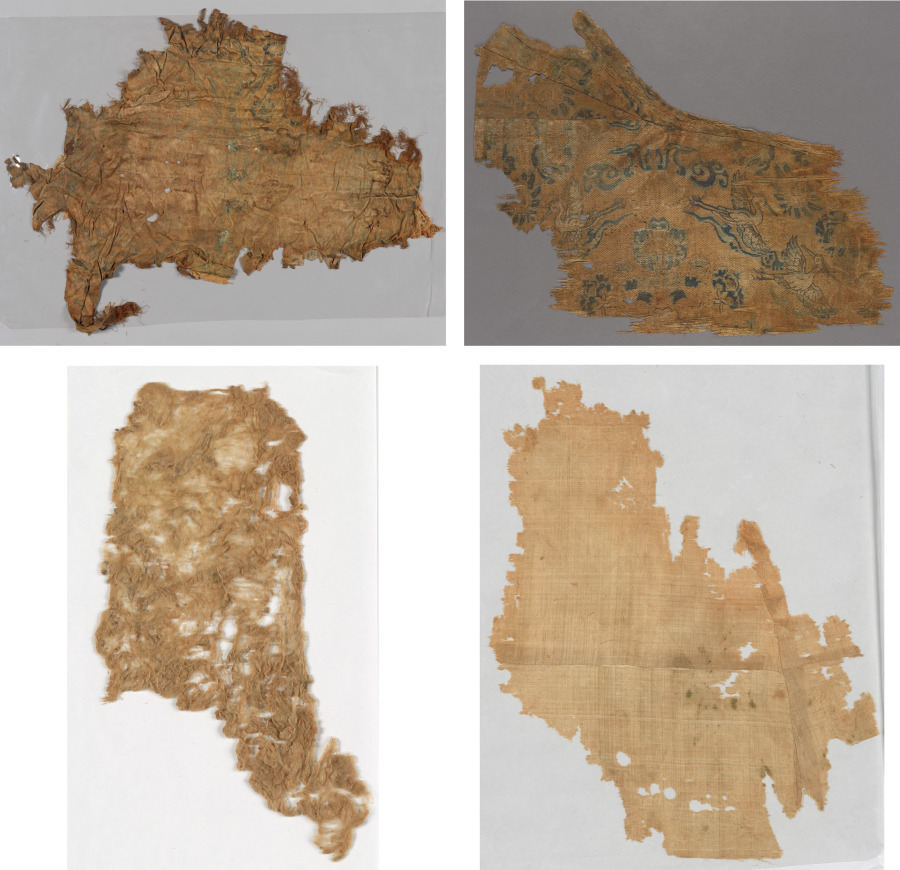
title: Fragments from a Garment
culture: China, Liao dynasty (916-1125)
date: 900s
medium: Silk, weft-faced compound twill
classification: Textile